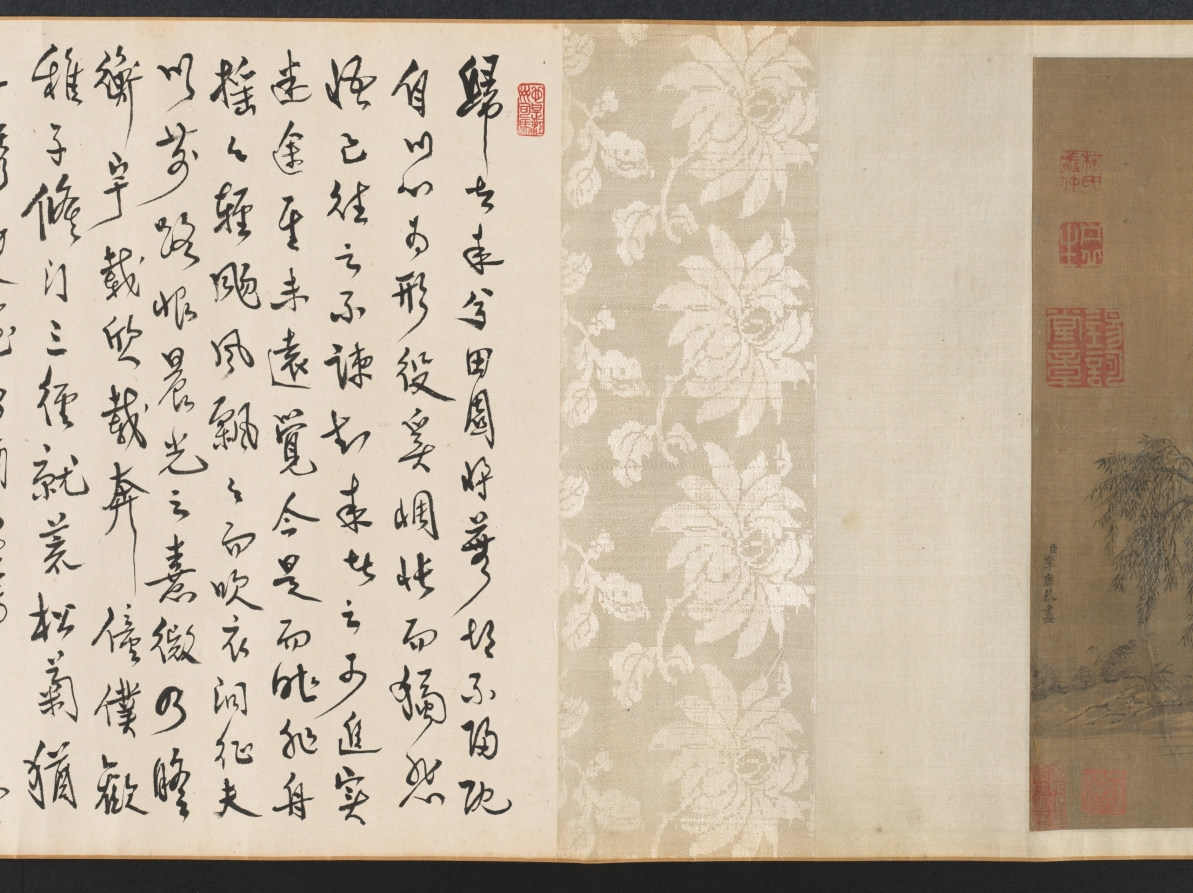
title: Tao Yuanming's Return Home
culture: China, Yuan dynasty (1271-1368)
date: 1300s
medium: Handscroll; ink and slight color on silk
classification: Painting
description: Tao Yuanming's revered poem "Return Home 歸去來辭 (Gui qu lai ci)" powerfully conveys his desire to leave bureaucratic life for the simplicity and authenticity of nature. This sentiment has deeply resonated with generations of Chinese scholars, making it a popular theme in paintings. This handscroll uses continuous narrative depicting Tao in multiple scenes from the poem. Starting on the right, the poet travels to his home. His children wait by the gate, while his wife pauses to tidy her hair before welcoming him. Then, free from the burdens of official service, Tao spends time in both nature and his cottage, where he can again enjoy wine, music, and books.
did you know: Poet Tao Yuanming 陶淵明 (c. 365–427 CE) returned to a secluded life instead of pursuing a civil service career.